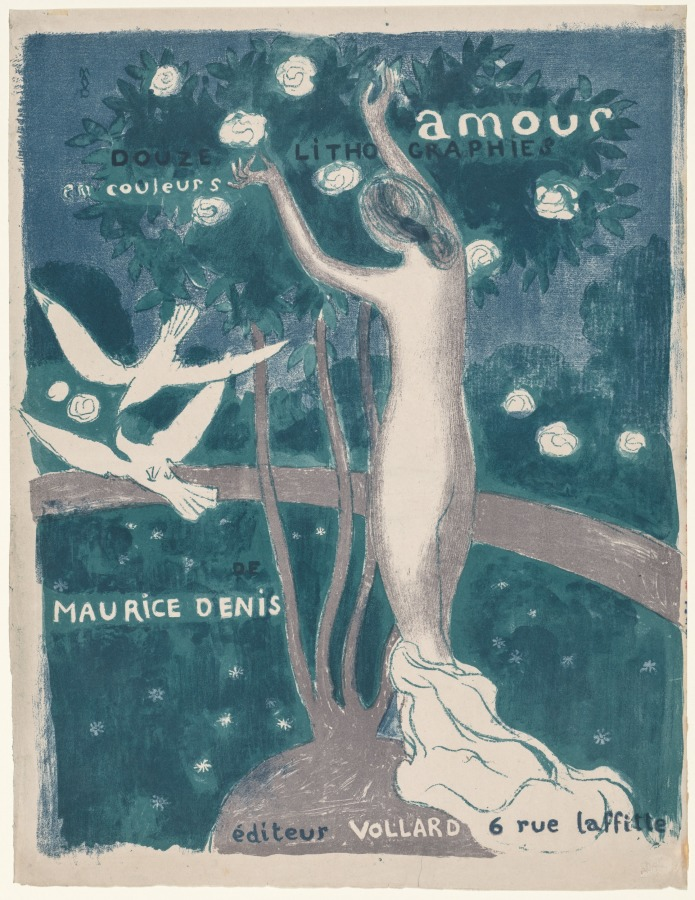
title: Cover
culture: France, 19th century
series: Love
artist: Maurice Denis (French, 1870–1943)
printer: Auguste Clot (French, 1858–1936)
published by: Ambroise Vollard (French, 1867–1939)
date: 1898, published 1899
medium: color lithograph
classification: Print